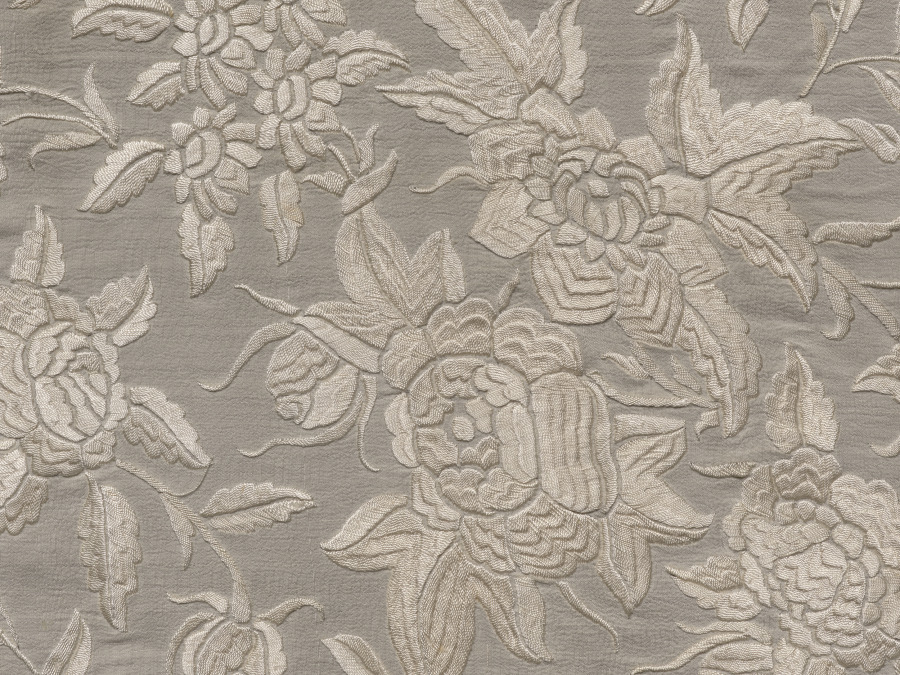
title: Silk Shawl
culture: China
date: 1800s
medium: embroidery, silk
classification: Embroidery